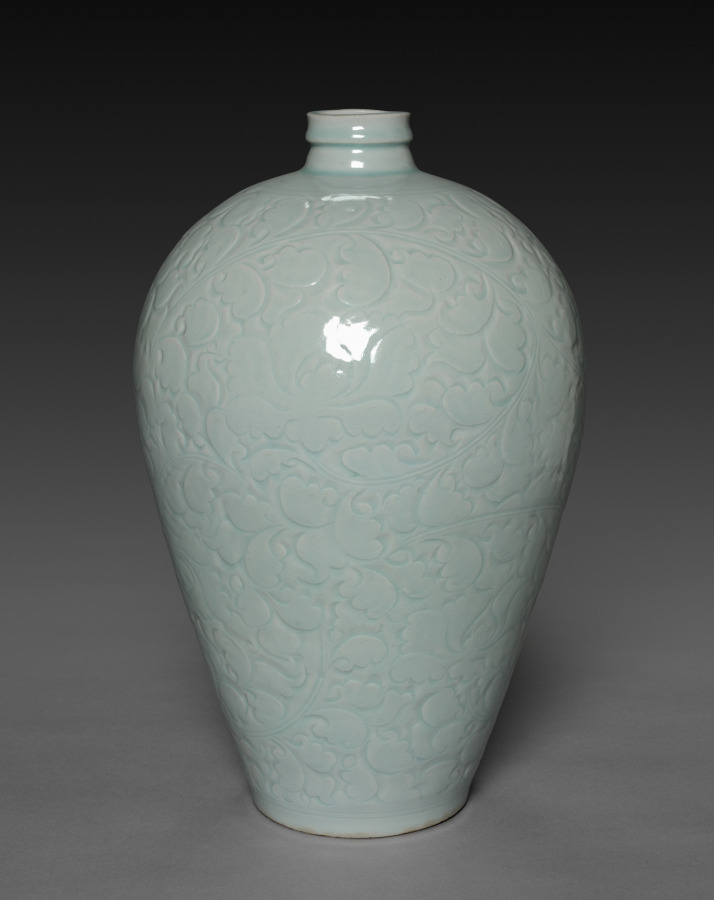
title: Meiping Vase with Carved Floral Sprays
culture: China, Song dynasty (960–1279)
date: 960–1279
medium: Porcelain with pale bluish-white glaze, qingbai ("blue-white") ware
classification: Ceramic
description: This magnificent plum vase (meiping) derives its name from being used to hold a branch from a flowering plum tree. Vases of this shape with a round shoulder and narrow opening originally served as wine containers. Kilns in southern China that produced this ware with a transparent bluish glaze were among the first that applied underglaze blue-and-white decoration, which became popular during the Yuan (1271–1368) and Ming (1368–1644) dynasties. These elegantly carved floral sprays on a monochromatic ground reflect the refined taste of the Song dynasty emperors.